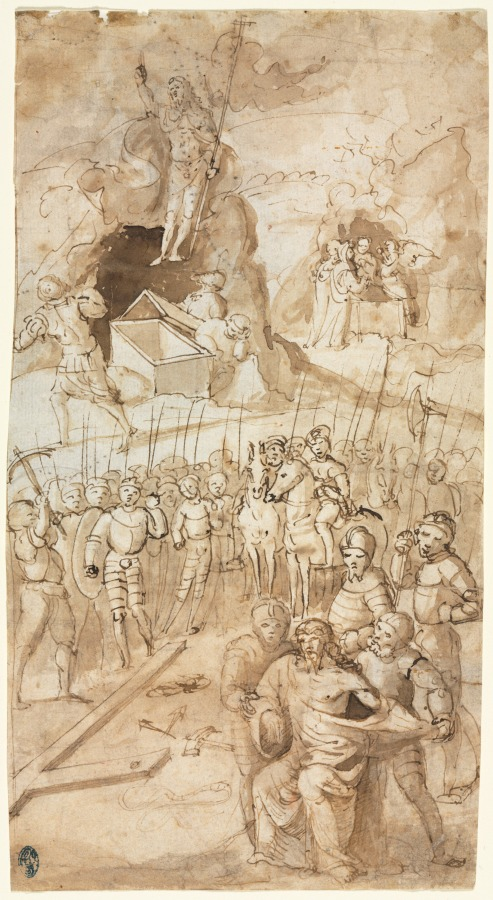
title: Three Scenes from the Passion of Christ (recto); Architectural Sketch (verso)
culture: Northern Italy, 16th century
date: 1500s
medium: pen and brown ink and brush and brown wash over traces of black chalk; framing line (left edge) in brown ink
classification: Drawing